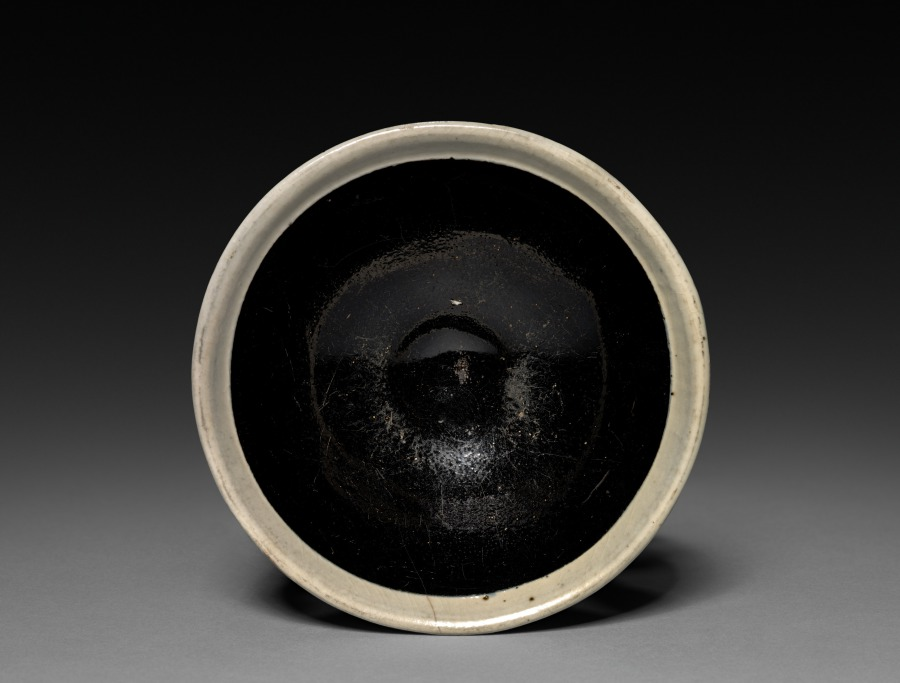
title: Tea Bowl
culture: China, Northern Song dynasty (960–1127)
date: 1100s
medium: stoneware, Northern black ware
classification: Ceramic